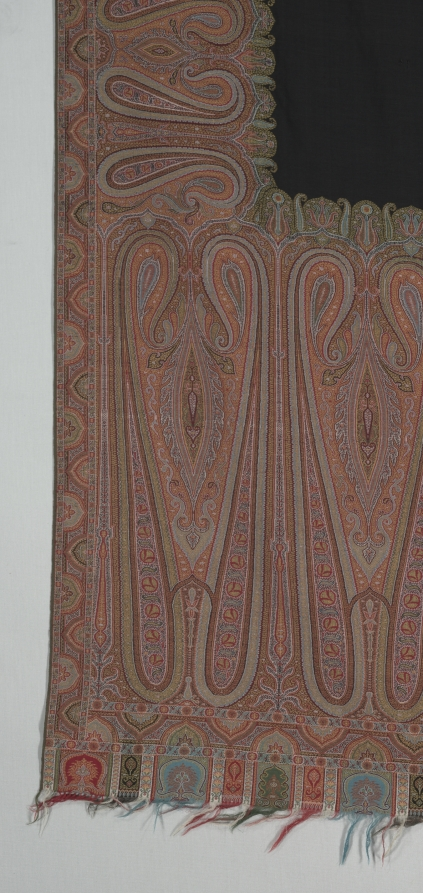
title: Shawl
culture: France, Nimes ?, 19th century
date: c. 1860s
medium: wool, compound weave, additional weft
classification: Textile